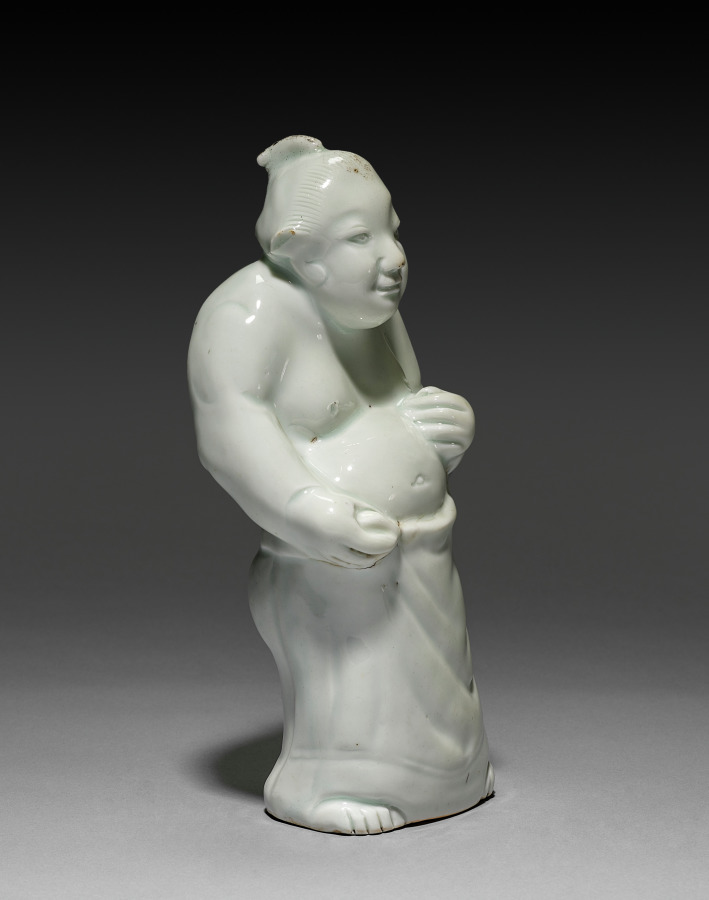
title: Standing Figure of a Sumo Wrestler, Arita Ware (?)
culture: Japan, Edo period (1615–1868)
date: 1700s-1800s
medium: porcelain, molded and carved, with celadon overglaze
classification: Sculpture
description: Catalogue of the Severance and Greta Millikin Collection (CMA, 1990): 85, no. 137.